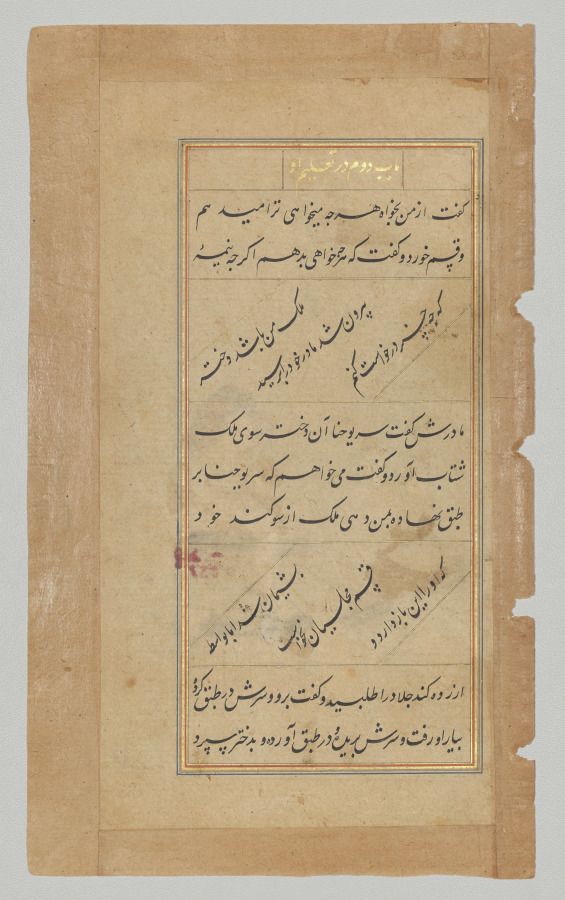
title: Text page from a Mirror of Holiness (Mir’at al-quds) of Father Jerome Xavier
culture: Mughal India, Allahabad, made for Prince Salim (1569–1627)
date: 1602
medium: Ink and gold on paper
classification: Manuscript